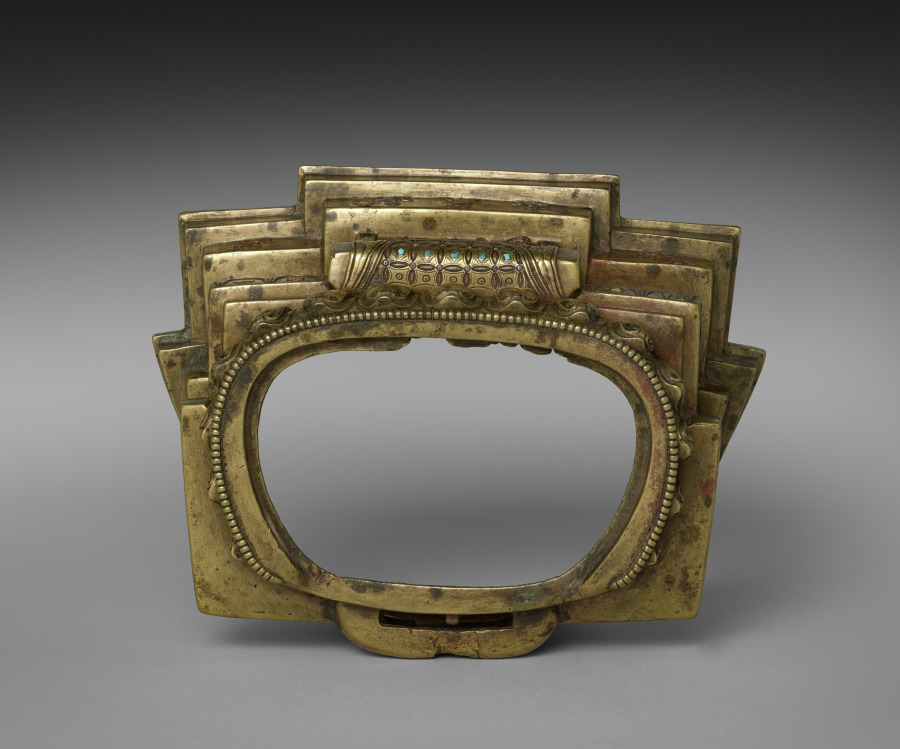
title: Base for Portrait of Phagmo Drupa Dorje Gyalpo (1110–1170)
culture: Central Tibet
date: 1200s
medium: gilt bronze, inlaid with gold, silver, copper, turquoise, lapis and coral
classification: Sculpture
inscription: / / Na mo 'ghu ru / / Ngan lam ban chung bdag gis ni / / bla ma Rin chen sku bzhengs pa yi / / bsod nams 'di yi byin brlabs kyis / / 'gro drug sdug sngal zad par shog / / Translation: "Salutations to the master ! May the sufferings of the six kinds of beings be appeased through the blessing of merit gained by me, the little monk of Ngan.lam, in having this statue of the Lama Rin.chen made."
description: This portrait statue depicts the first monastic leader of the prominent Buddhist monastery of Densatil, an influential early leader of the Tibetan Buddhist monastic order called Kagyu, famous for his views on the importance of meditation. He sits on a lotus pedestal and lion throne, like a Buddha, and his hand positions (mudras) communicate that meditation leads to enlightenment.